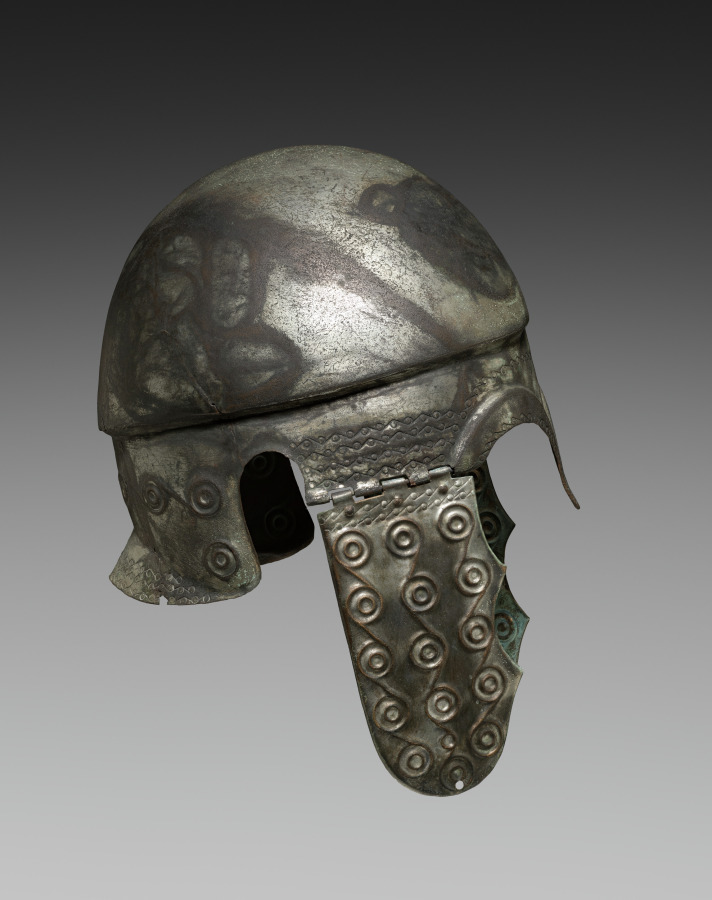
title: Chalcidian Helmet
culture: Greek (perhaps Black Sea area)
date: c. 350–200 BCE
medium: Tinned bronze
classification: Arms and Armor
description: Among ancient helmets, the Chalcidian type is varied, widespread, and comparatively unrestrictive, with relatively wide openings for the eyes and ears. This example, probably made in the Black Sea region or even further east, features a pointed noseguard, high carinated crown, molded brow ridge, and everted rear flange, plus large separately made hinged cheekpieces. The tinned bronze surface is almost silver in color, with extensive decoration including small incised linked scrolls and much larger embossed linked scrolls.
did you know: Although named for Chalcis, a city in Euboia, Chalcidean helmets were made across the Greek world.